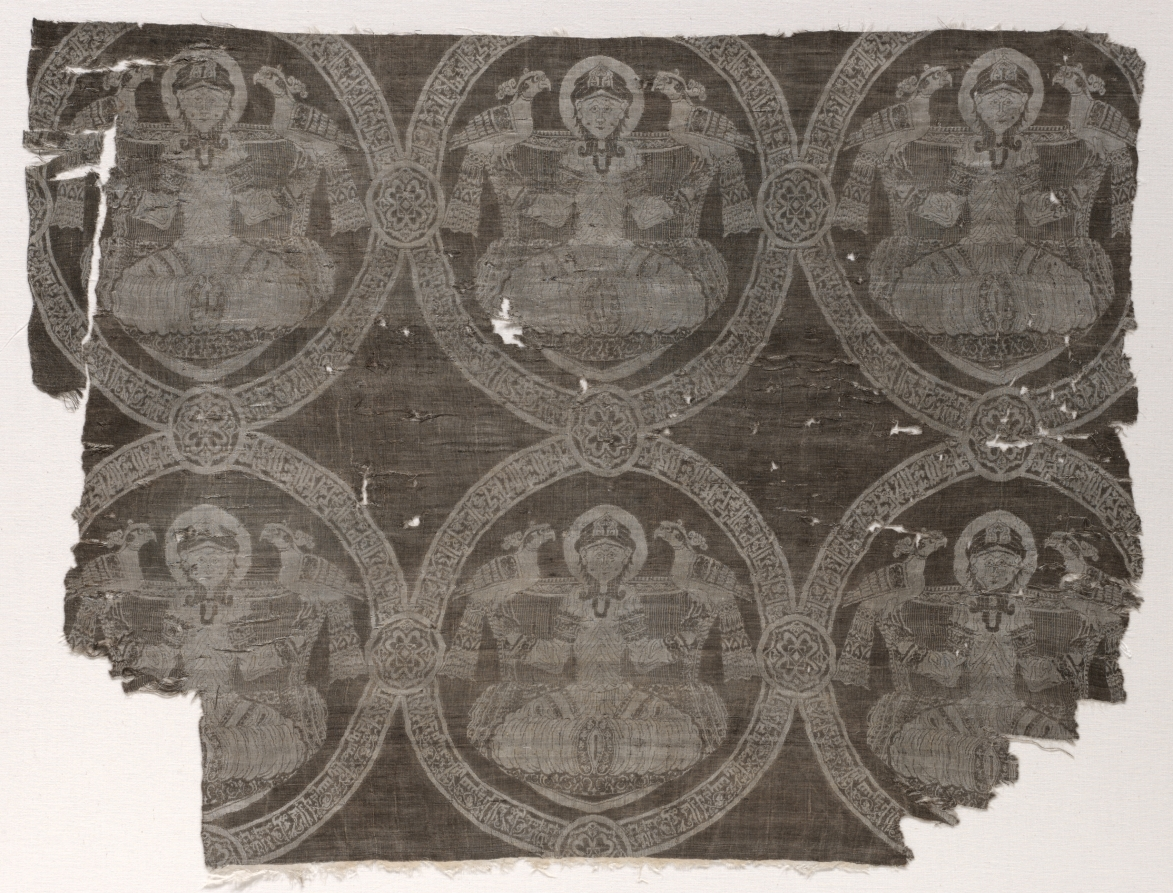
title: Fragment with seated prince holding falcons in kufic medallions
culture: Iran ?, in the style of the Buyid period (945–1055)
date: 1654–1955 (radiocarbon date, 95% probability)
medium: Silk: lampas weave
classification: Textile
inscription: Top left: mubarak al-amir al-ajall Rukn al-Dunya wa-al-Din Abu al-Muz . . .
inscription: Bottom left: . . . affar Iyad bin Suhayl bin Shirdil [?] al-Dihli matta'ahu Allah bihi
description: The design consists of aligned rows of linked roundels enclosing a prince seated on a cushioned throne and holding a large falcon on each hand. The roundel is framed by an inscription in floriated Kufic, which is orthograde along the left half of the roundel and retrograde along right half. The points of junction of the large roundels are ornamented by small roundels enclosing star motifs.